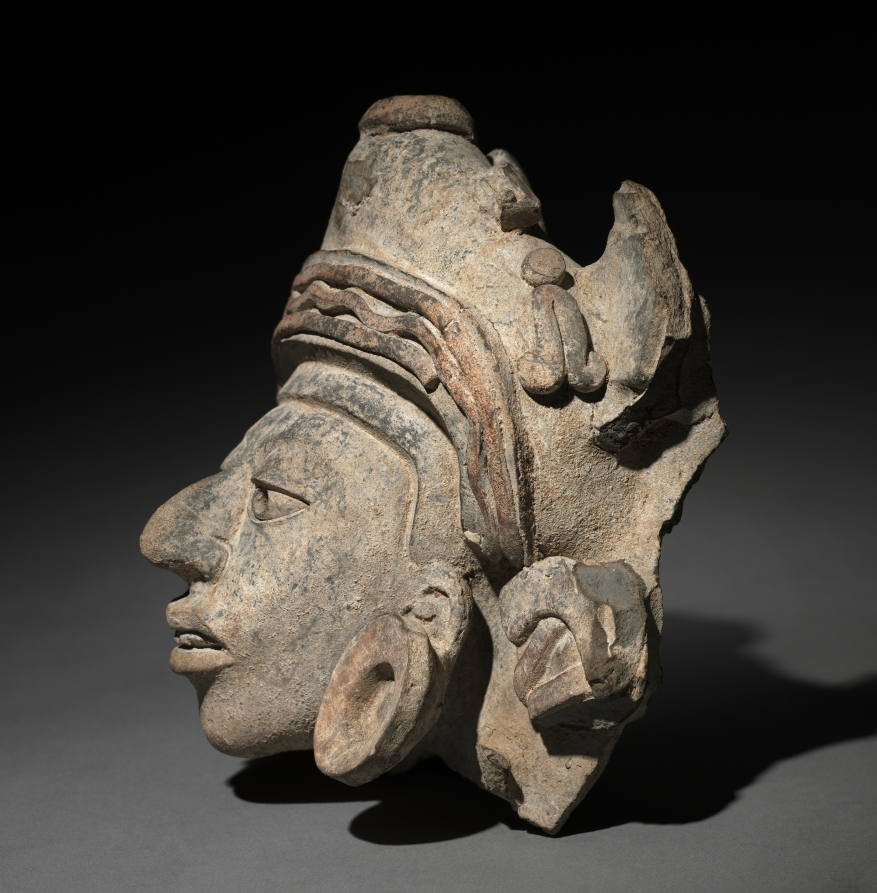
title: Urn Figure Head Fragment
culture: Mexico, Oaxaca, Zapotec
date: c. 200–500 CE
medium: earthenware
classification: Sculpture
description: The face of this fragmentary urn figure is modeled with exceptional sensitivity. The downward gaze of the drilled pupils imparts a sense of quiet alertness.